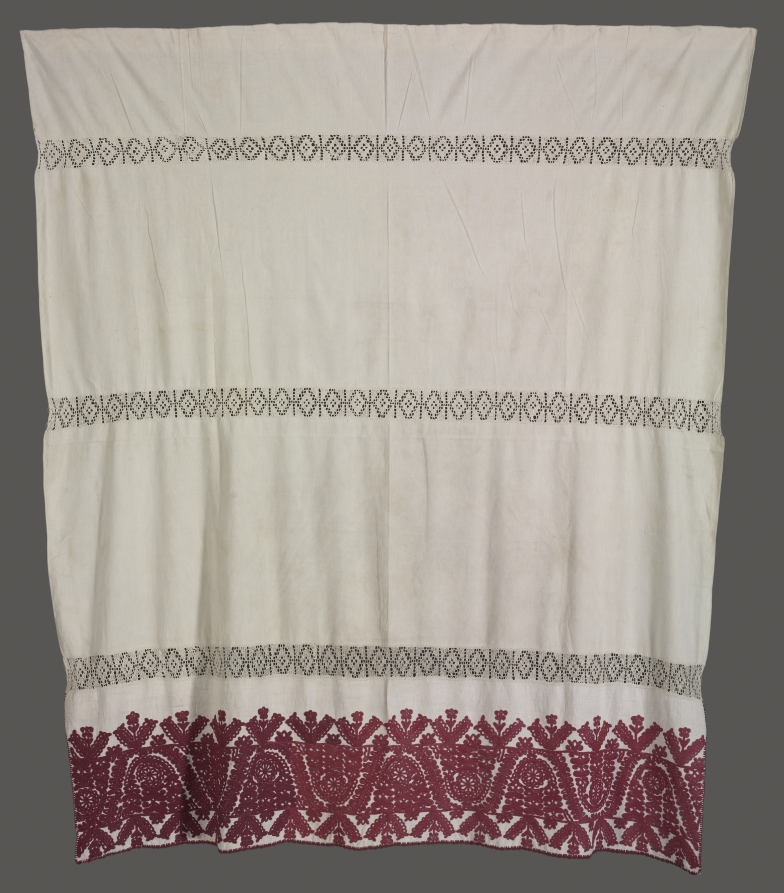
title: Bedspread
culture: Hungary, Kalotaszeg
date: late 1800s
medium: linen, embroidery, crochet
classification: Embroidery